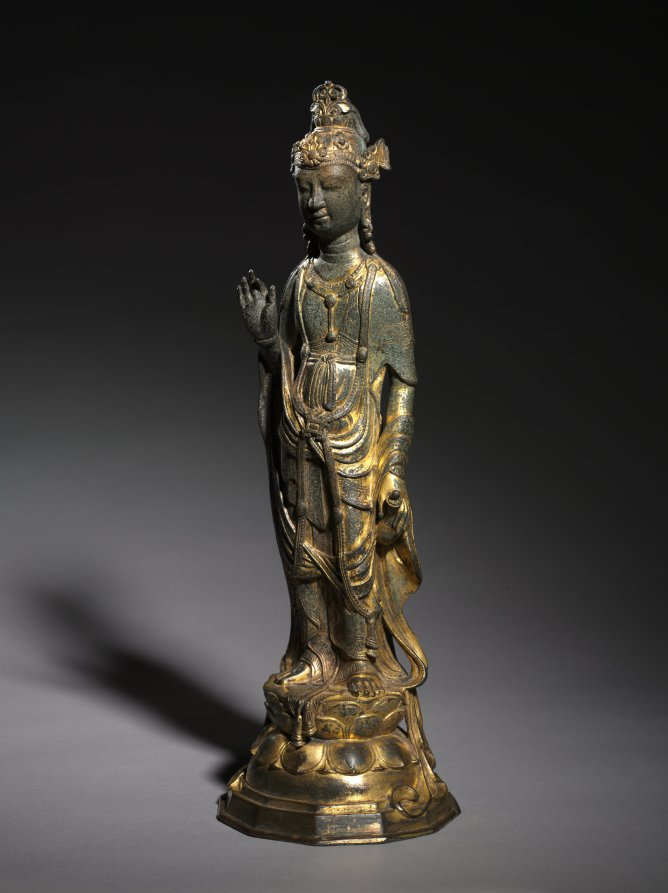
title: Bodhisattva Guanyin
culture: China, Liao dynasty (916-1125)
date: 900s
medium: gilt bronze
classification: Sculpture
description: In Buddhism, a bodhisattva is a being who, just before reaching enlightenment, turns back to assist others to reach enlightenment first. This bodhisattva holds his hand palm forward, in a gesture that tells followers not to fear. In his other hand he carries a bottle that holds the elixir of immortality.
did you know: The Liao rulers were devout Buddhists who commissioned substantial religious projects.